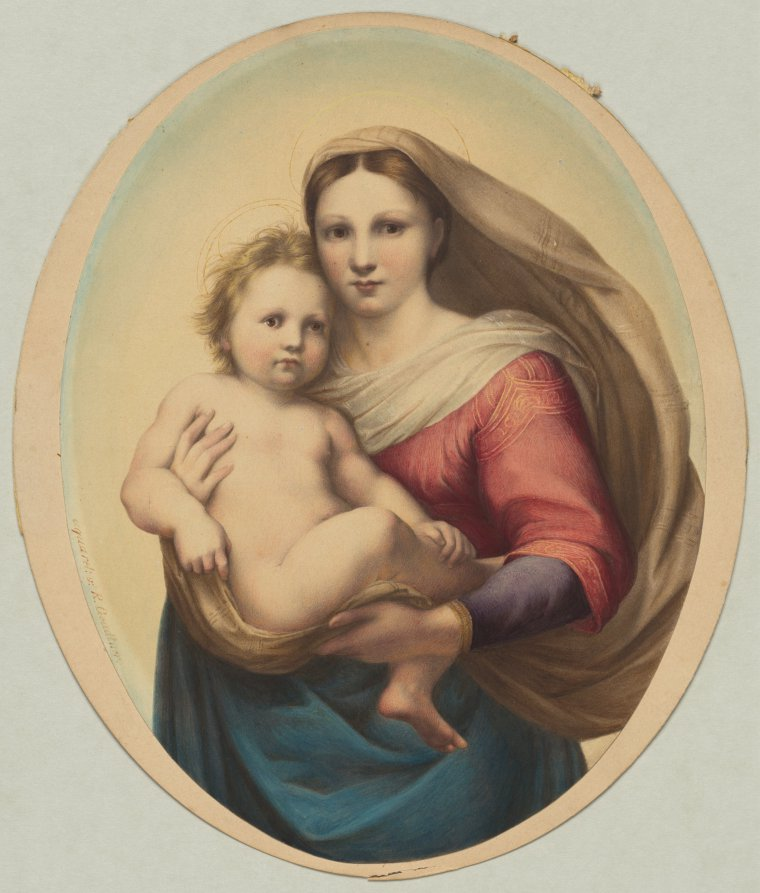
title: Copy after Raphael's Sistine Madonna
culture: Germany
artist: Rudolph Geudtner (German, 1811–1892)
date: 19th century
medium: watercolor and gouache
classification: Drawing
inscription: signed, lower left, along left edge, in red watercolor: aquaerel: v: R. Geudtner